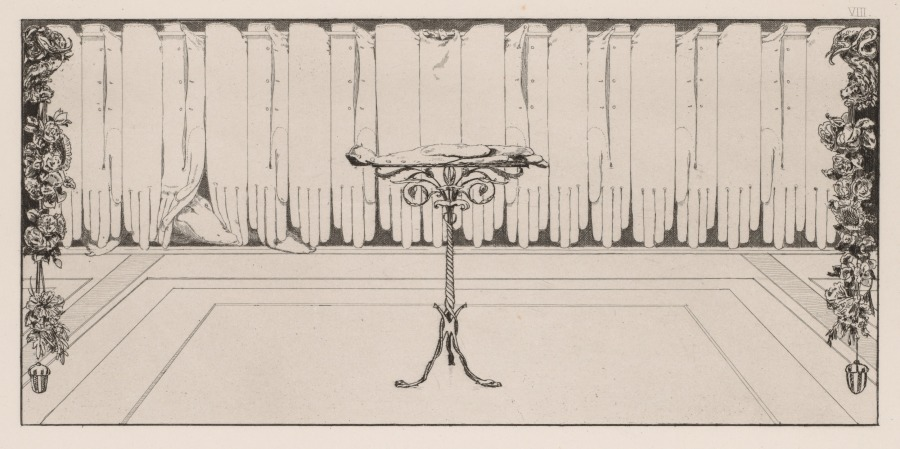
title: A Glove: Repose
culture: Germany, 19th century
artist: Max Klinger (German, 1857–1920)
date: 1880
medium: etching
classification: Print